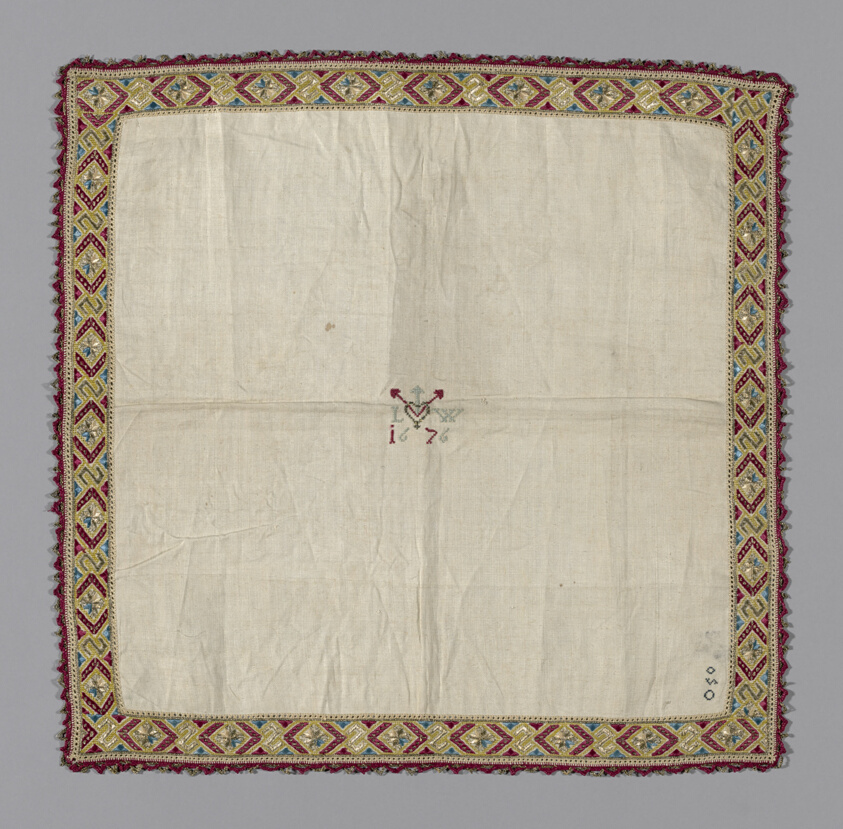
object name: Textile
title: Handkerchief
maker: Italy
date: 1676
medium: Linen, plain weave; cut and drawn work; embroidered silk and gilt-metal-strip-wrapped silk in cross, satin, buttonhole, overcast, detached overcast, and four-sided stitches; edged with applied silk and gilt-metal-strip-wrapped silk braid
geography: Italy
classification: textile; needlework (visual works); accessories (object genre)